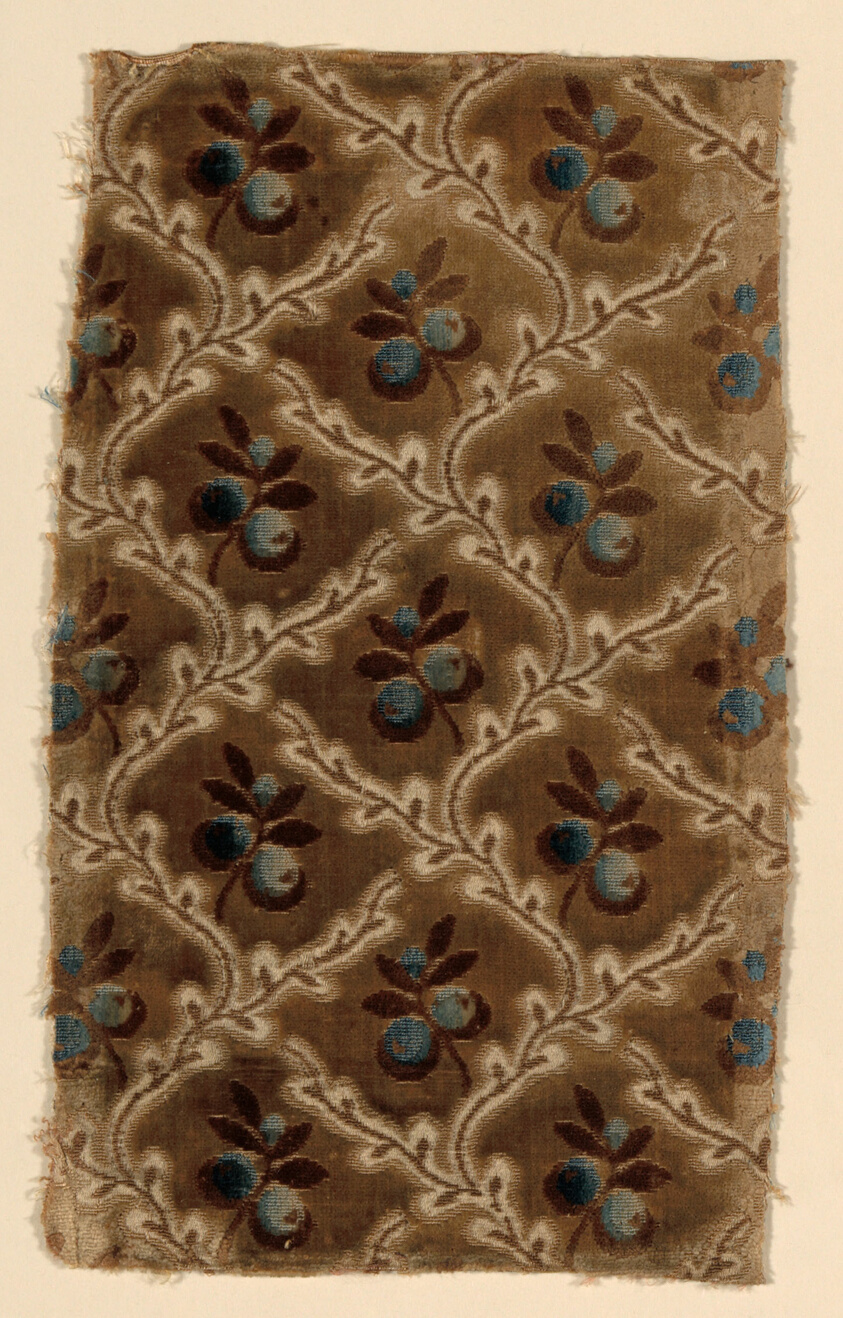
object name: Textile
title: Fragment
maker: France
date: 1750/75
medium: Silk, cut, uncut, and voided velvet against satin weave foundation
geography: France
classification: textile; weaving - velvet